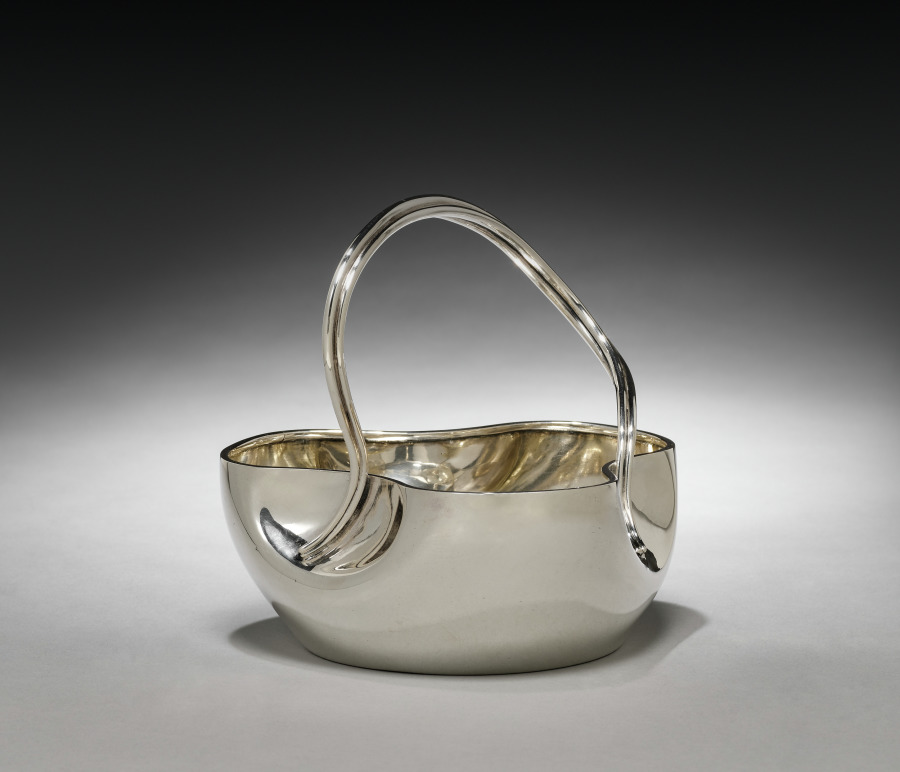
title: Bowl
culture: Russia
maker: House of Fabergé (Russian, 1842–1918)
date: 1895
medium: silver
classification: Silver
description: While Fabergé mainly produced objects with historicist ornamentation drawing upon earlier periods, the firm was also attentive to the latest fashions in the European decorative arts. This silver bowl is executed in the Art Nouveau style popular at the time. Its indented body and the asymmetrical handle convey a sense of liquid movement, accentuated by the undulating reflections on the silver surface.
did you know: The size suggests that it was used either for sweets or simply displayed for its aesthetic value.